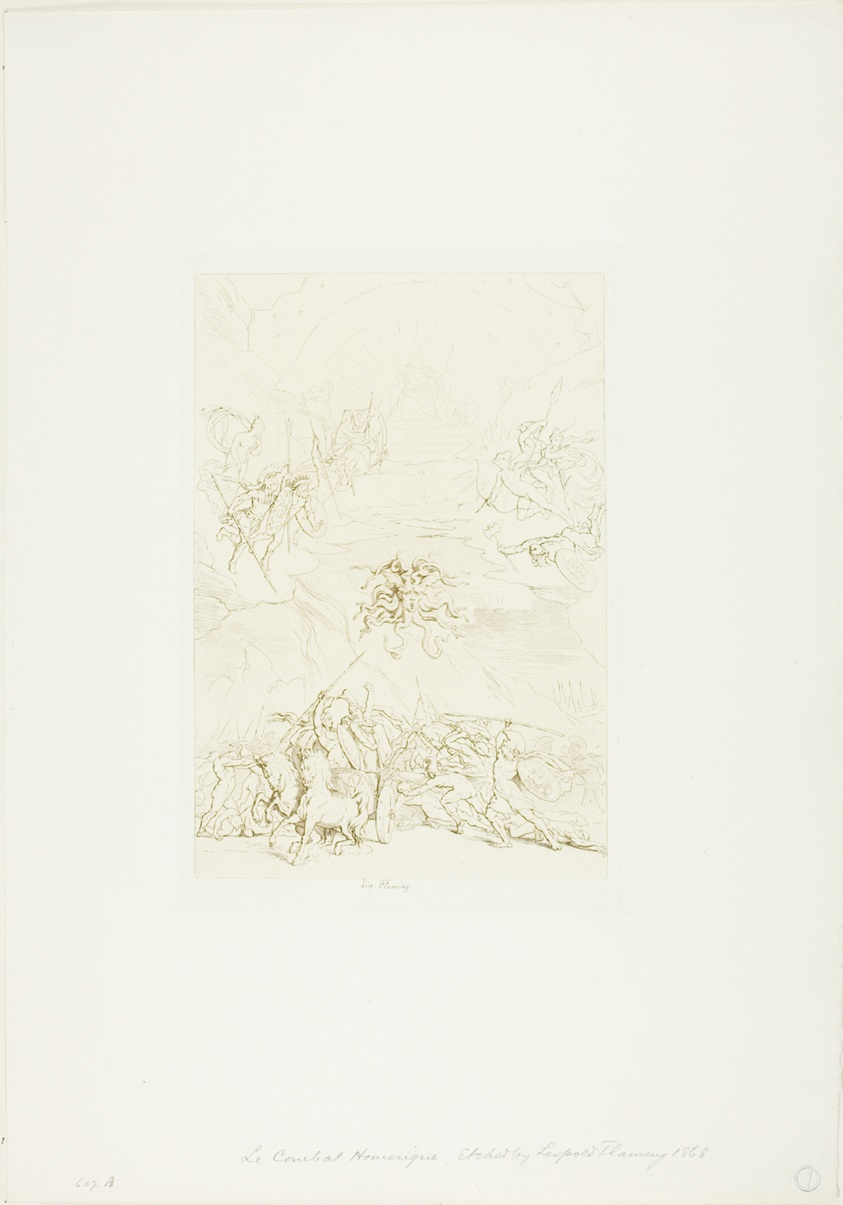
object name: Print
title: Homeric Battle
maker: Léopold Flameng (French, born Belgium, 1831-1911)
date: 1868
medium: Etching, with plate, tone on ivory wove paper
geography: France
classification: etching; print; prints and drawing